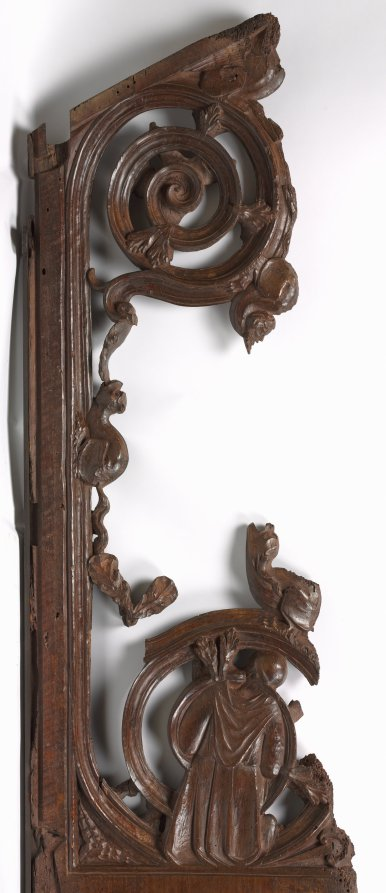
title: Panel from a Choir Stall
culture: Spain, Catalonia, Monastery of Pedralbes, 14th century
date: c. 1330–1340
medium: walnut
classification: Furniture and woodwork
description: The large panel shown here was probably the end panel of a stall that faced another across the choir of a Gothic church. The panel is carved with the figure of St. Francis of Assisi kneeling in prayer and receiving the stigmata. Two standing figures also appear on this panel: a nun at the left (perhaps St. Claire) and a female martyr at the right. Below is St. Michael and the dragon.